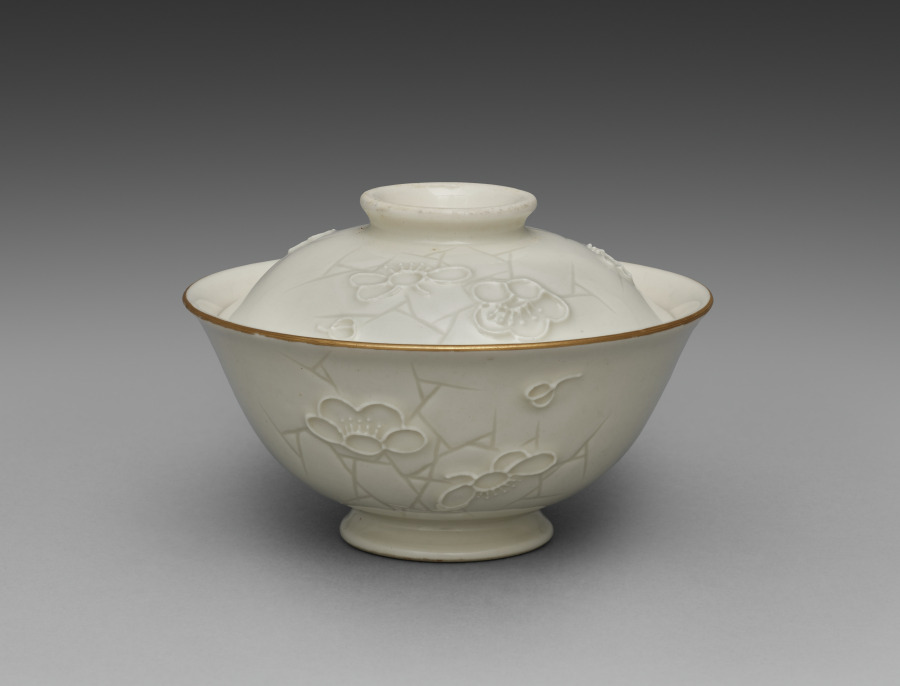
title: Covered Bowl from Dining Set with Plum Blossoms and Cracked-Ice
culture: Japan, Meiji period (1868–1912)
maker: Seifū Yohei II (Japanese, 1844–1878)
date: c. 1875–78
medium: Porcelain with molded designs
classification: Ceramic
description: Each item in this set has a delicate low-relief design of flowering plum branches over scattered, intersecting lines meant to resemble the cracked-ice surface of a frozen body of water and is signed on the base in gold pigment. While Yohei II produced many fine works in underglaze blue, like those produced by Kiyomizu Shichibei, he also made works in quite different styles later in his career, from the early 1870 s. In 1873, he was appointed purveyor to the Industrial Center of Kyoto Prefecture, a designation associated with Kyoto’s efforts to reach an international market through the port of Kobe; and from 1875 until his death, he was involved in national-level projects to present Japanese ceramics across the world. It was during this period that Yohei III was apprenticed to Yohei II, and it has been suggested that this set may in fact be an early example of Yohei III’s work, which he signed with his teacher’s name. Decorated with flowers resembling Japanese textile motifs, the set calls to mind the design of Yohei II’s pair of vases with plum blossoms in the Victoria and Albert Museum. Here, the elaborate trees created for a formal public exhibition setting have been translated into the approachable blossoms of the genteel domestic environment. While the designs are consistent across the pieces, each raised flower petal and pistil and each incised line in the ice was done by hand, so the cups, bowls, and dishes are similar yet unique. The bottoms of two boxes once identified the set’s owner, but the information has been deliberately obscured with black ink. However, inscriptions still visible appear to indicate two occasions, once at the end of July 1886 , and once again in June 1916 , when parts of the set were requested from Hokura in Niigata Prefecture. The location corresponds to a neighborhood in the present-day city of Jōetsu. The surname Tsuji 辻 also appears on a paper tag affixed to one of the box cloths. Future research may possibly reveal more about their provenance. A vase by Yohei III in a private collection combines the formal grandeur of the Yohei II vases in the Victoria and Albert Museum with the gentler design of this dining set, placing flowering plum trees against soft, scalloped-edge clouds resembling those in golden screens.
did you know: The dining wares have a creamy white coloration that the four boxes containing them identify as Korean in style.